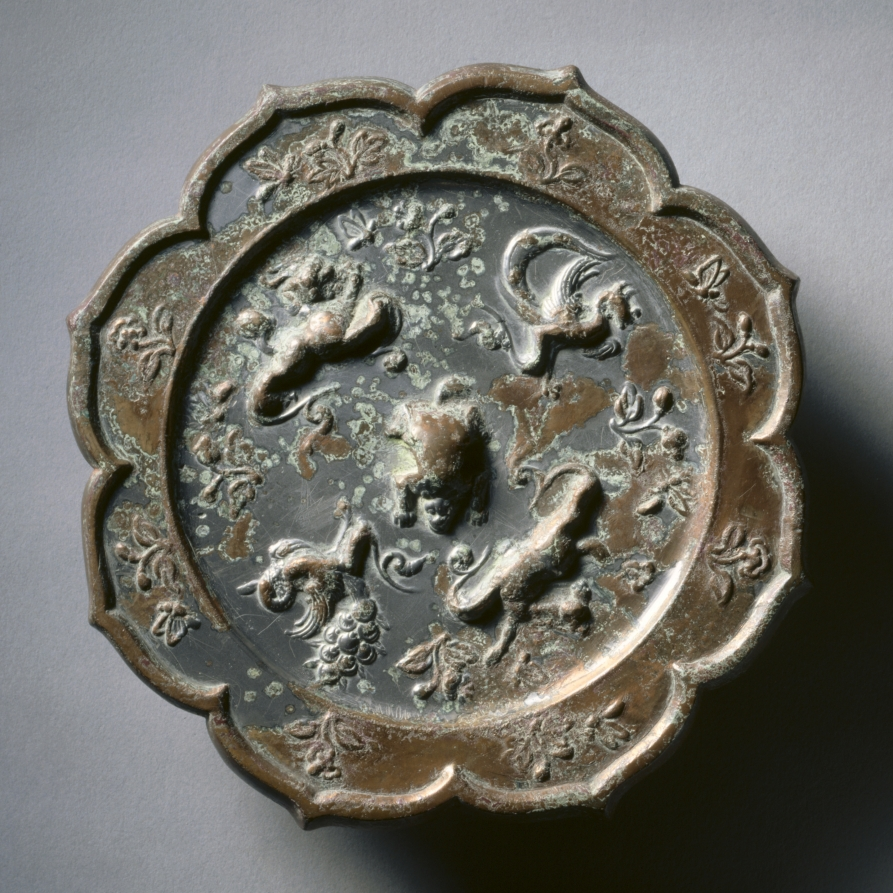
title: Octafoil Mirror with Crouched Animals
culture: China, Tang dynasty (618-907)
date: early 600s-early 900s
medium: bronze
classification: Metalwork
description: The mirror was cast using lost-wax technology. Extensive chisel work was done to finish the back. Harsh chemicals were used to remove the corrosion from the mirror, leaving re-deposited copper scattered on the surface.